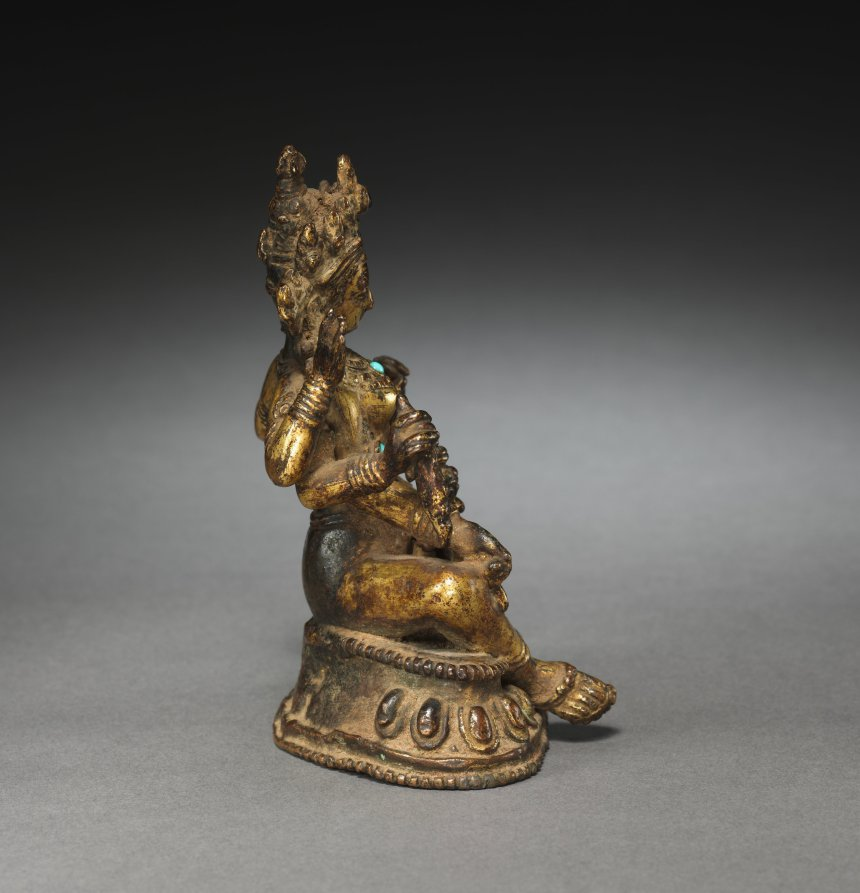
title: Seated Vasudhara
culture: Nepal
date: c. 1300s(?)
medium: brass or bronze; turquoise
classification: Sculpture